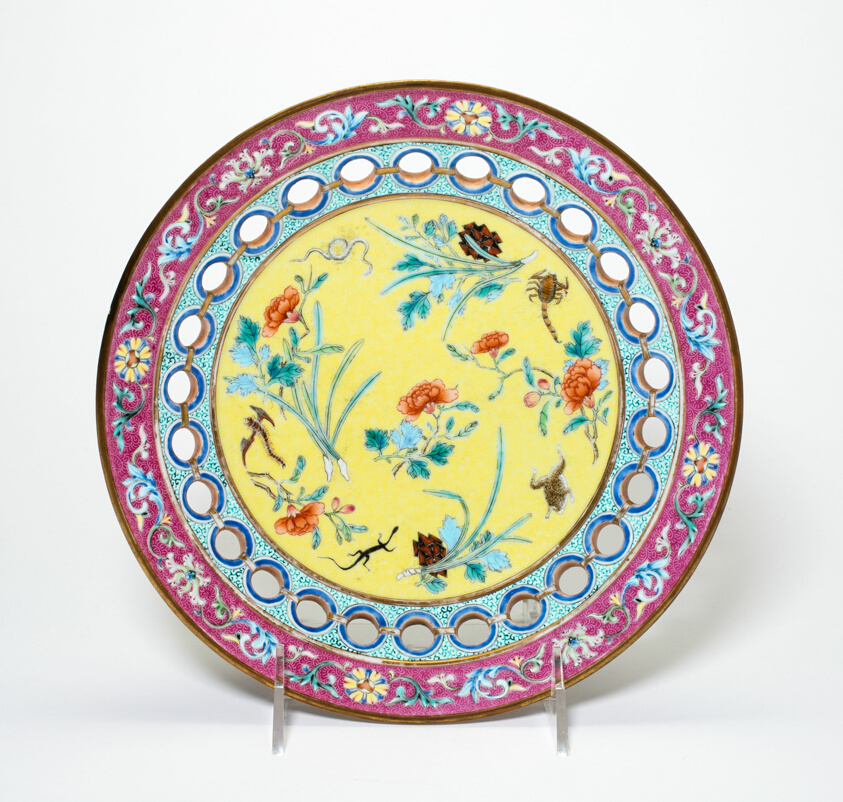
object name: Vessel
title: Plate with Talismans for Duanwujie (Dragon Boat Festival)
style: Chinese (culture or style)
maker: China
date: Qing dynasty (1644–1911), Qianlong reign mark and period (1736–1795)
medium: Porcelain painted in overglaze enamels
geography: China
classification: plate (general, dish); dish (vessel); ceramics; vessel